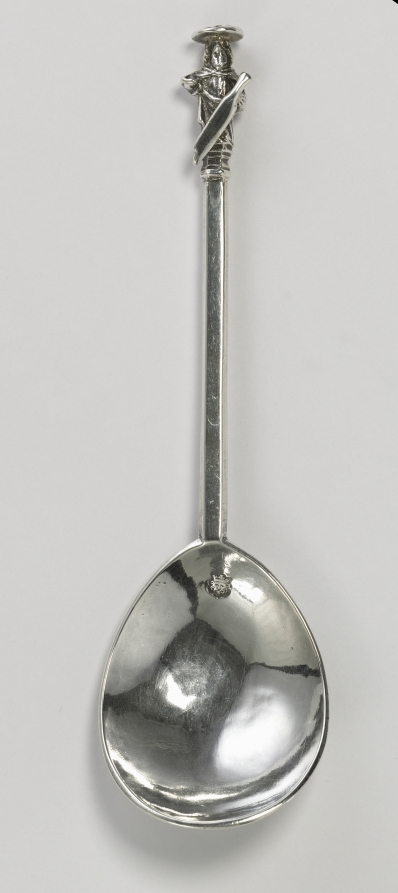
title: Saint Bartholomew Spoon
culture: England, London, 17th century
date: 1622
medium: silver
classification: Silver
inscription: pricked on back of bowl: "R H."